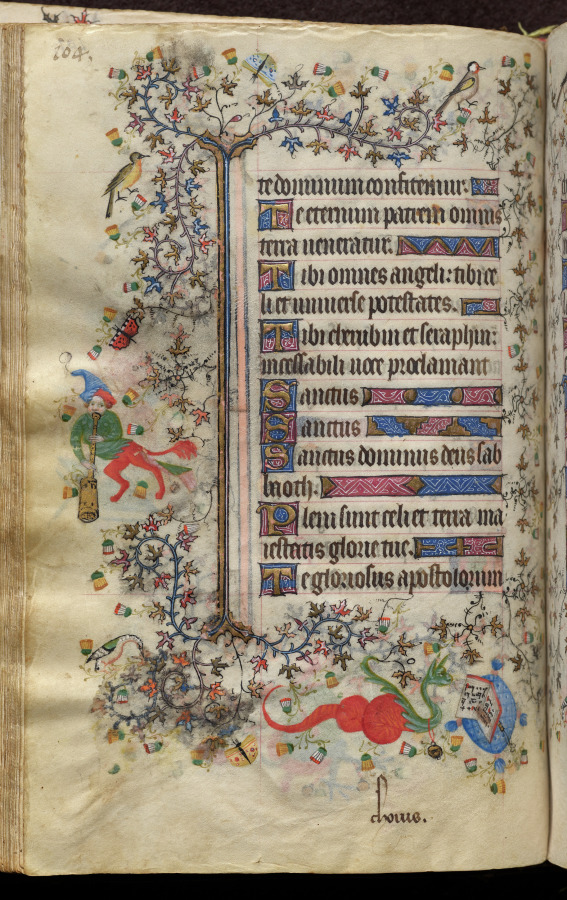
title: Hours of Charles the Noble, King of Navarre (1361-1425): fol. 52v, Text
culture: France, Paris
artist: Master of the Brussels Initials and Associates (French)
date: c. 1405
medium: ink, tempera, and gold on vellum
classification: Bound Volume